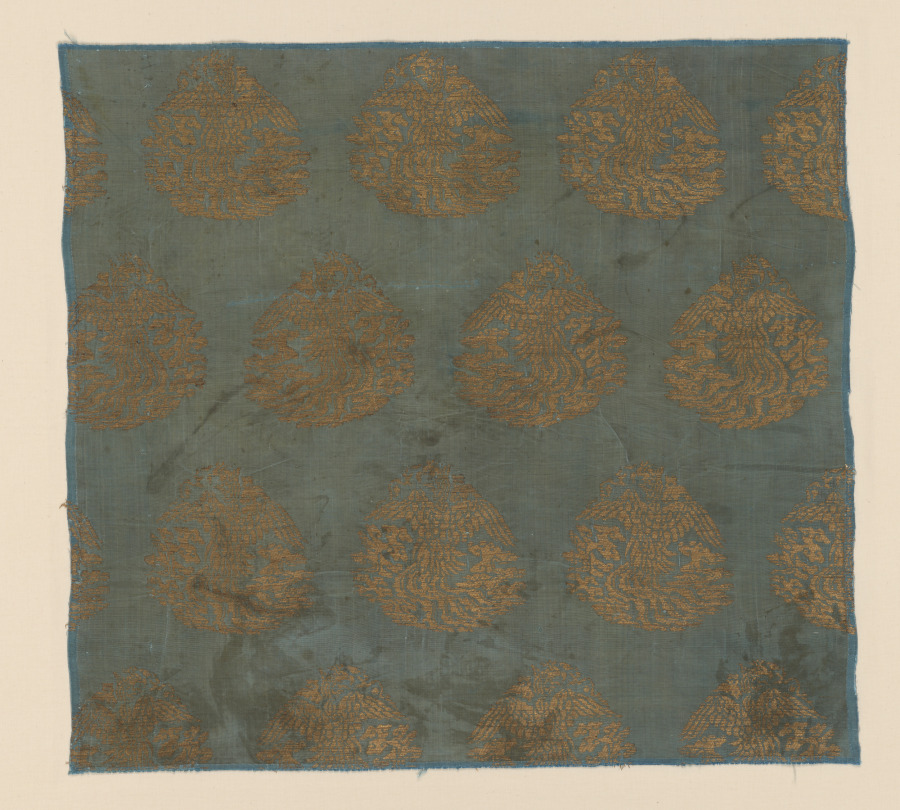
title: Brocade with Soaring Phoenixes among Clouds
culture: China, Jin dynasty (1115–1234)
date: 1100s–1200s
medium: Silk and gold thread; tabby, brocaded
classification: Textile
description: The gold-brocaded designs of Jin brocades, such as this example with graceful phoenixes soaring into clouds, are typically asymmetrical. Moreover, they have no frame or border, and appear to have been cut out of larger decorative images.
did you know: Textiles like this, which were probably exported from China to Iran, helped transmit the phoenix motif into Ilkhanid decorative arts.